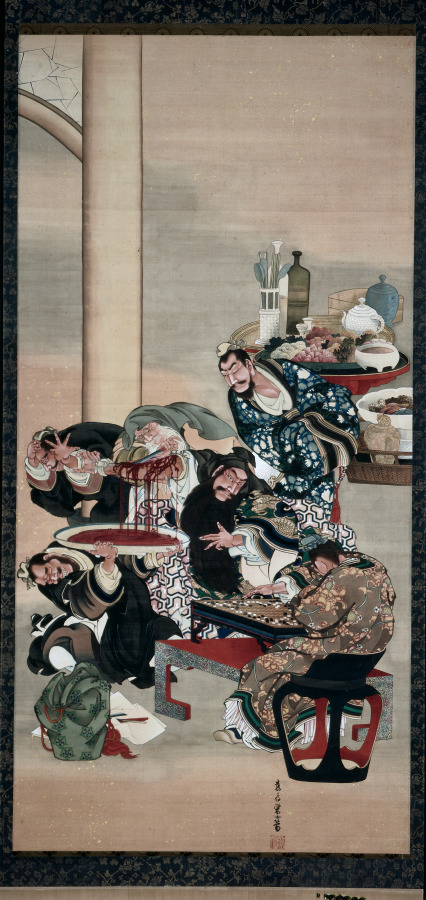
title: Operating on Guan Yu's Arm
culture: Japan, Edo period (1615–1868)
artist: Katsushika Ōi (Japanese, c. 1800-after 1857)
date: 1840s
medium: hanging scroll; ink, color, and gold on silk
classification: Painting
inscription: 款記「應為栄女筆」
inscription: 「葛しか」白文方印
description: Ukiyo-e artists’ subject matter extended to popular literature. Katsushika Ōi used color to great effect in her gruesome version of an episode from a 14th-century Chinese novel, Romance of the Three Kingdoms. Ōi portrayed the passage in which legendary 3rd-century military leader Guan Yu undergoes a bone scraping to remove poisons received from an arrow wound. In this sensationalist portrayal, Guan Yu’s attendants cower at the sight of his bloody arm while he remains unflinchingly focused on his game. As a woman, Ōi was an outlier in her era, but her talent was allowed to shine due to collaboration with her father, Katsushika Hokusai (1760–1849), the famed designer of the print known as The Great Wave.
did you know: This is the largest surviving painting by the artist.